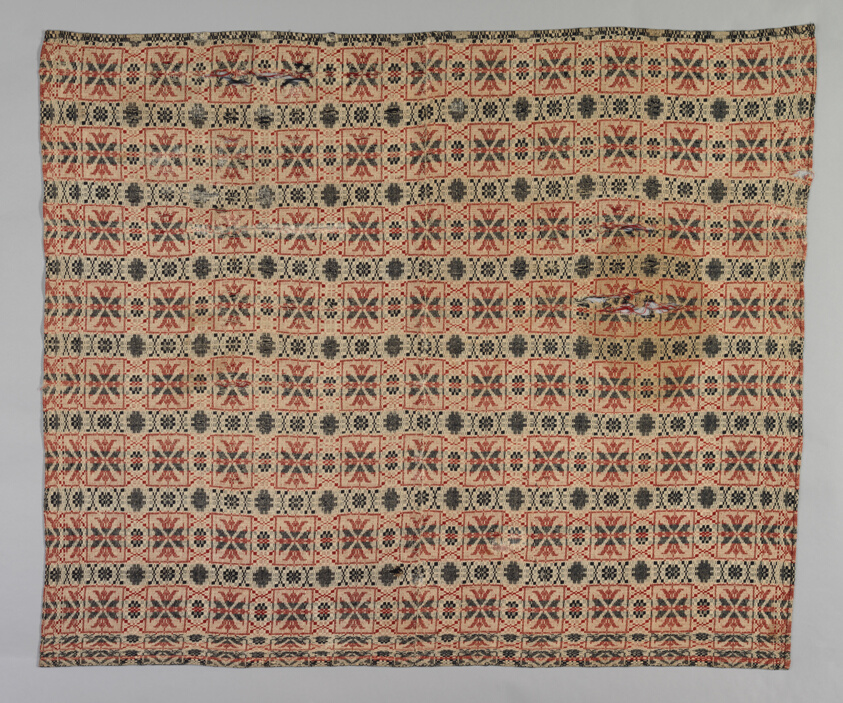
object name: Textile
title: Coverlet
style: American Fancy, Star work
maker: United States, Probably Pennsylvania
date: 1820-40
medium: Cotton and wool, plain weave with supplementary wefts in composite point twill weave (multiple shaft, 4 tie-down); two loom widths joined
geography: Pennsylvania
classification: weaving - coverlet; coverlet; weaving; textile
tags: coverlet, geometric motif, grids, floral motifs, squares, star work